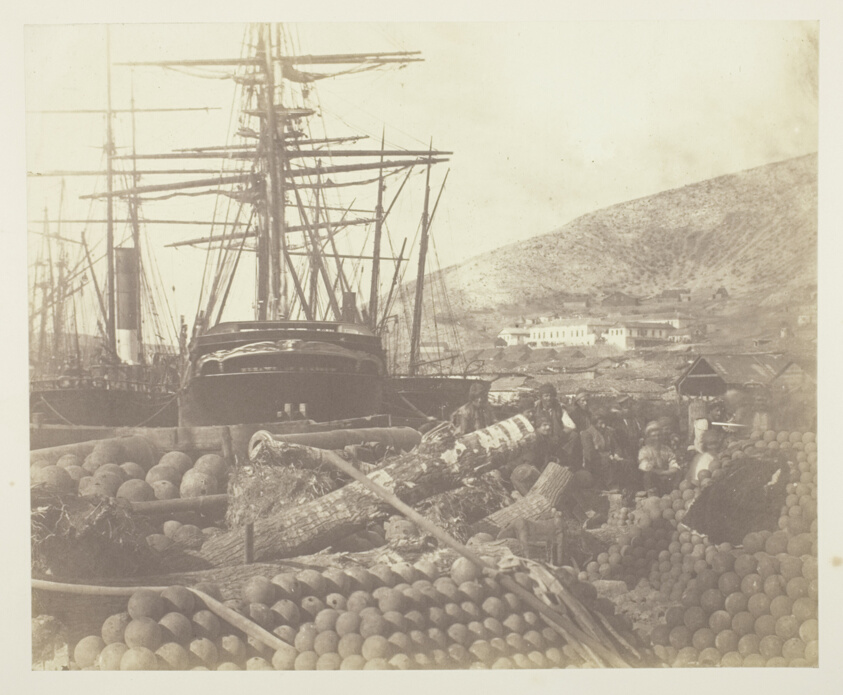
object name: Photograph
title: The Ordnance Wharf, Balaklava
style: 19th century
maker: Roger Fenton (English, 1819–1869)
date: 1855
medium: Salted paper print, plate 25 from the album "Photographs Taken in the Crimea" (1856)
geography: England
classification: salted paper print; photographic process; photography; photograph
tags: Collected by Hugh Edwards, Crimea 1856